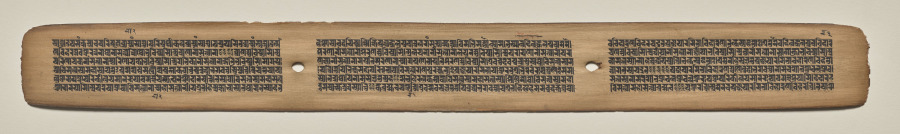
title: Text, folio 158 (recto), from a Manuscript of the Perfection of Wisdom in Eight Thousand Lines (Ashtasahasrika Prajnaparamita-sutra)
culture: Eastern India, Bihar, Vikramashila Monastery. Painting: Nepal, Kathmandu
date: Sunday, September 14, 1119 (year 239 of the Newar Samvat in the month of Ashvina)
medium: gum tempera and ink on palm leaves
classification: Painting